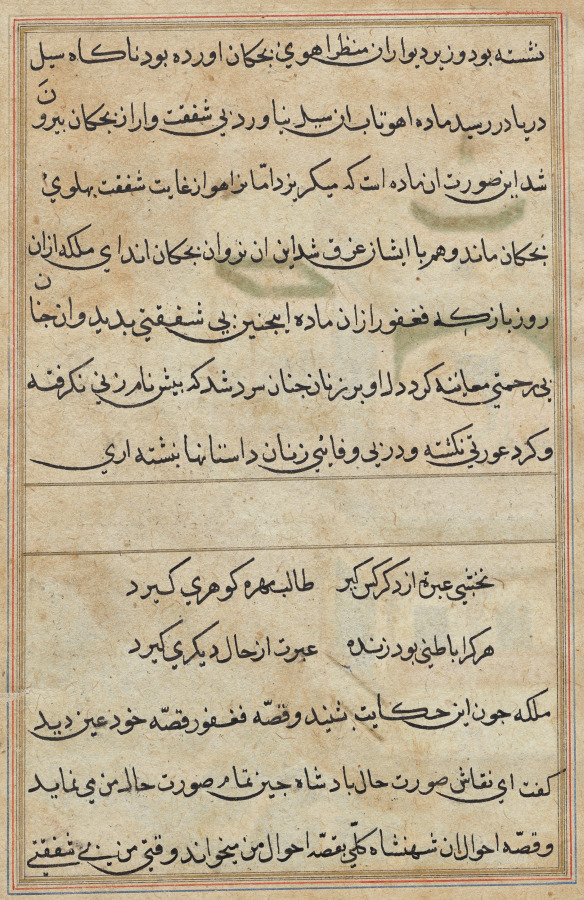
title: Page from Tales of a Parrot (Tuti-nama): text page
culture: Mughal India, court of Akbar (reigned 1556–1605)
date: c. 1560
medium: gum tempera, ink, and gold on paper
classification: Painting